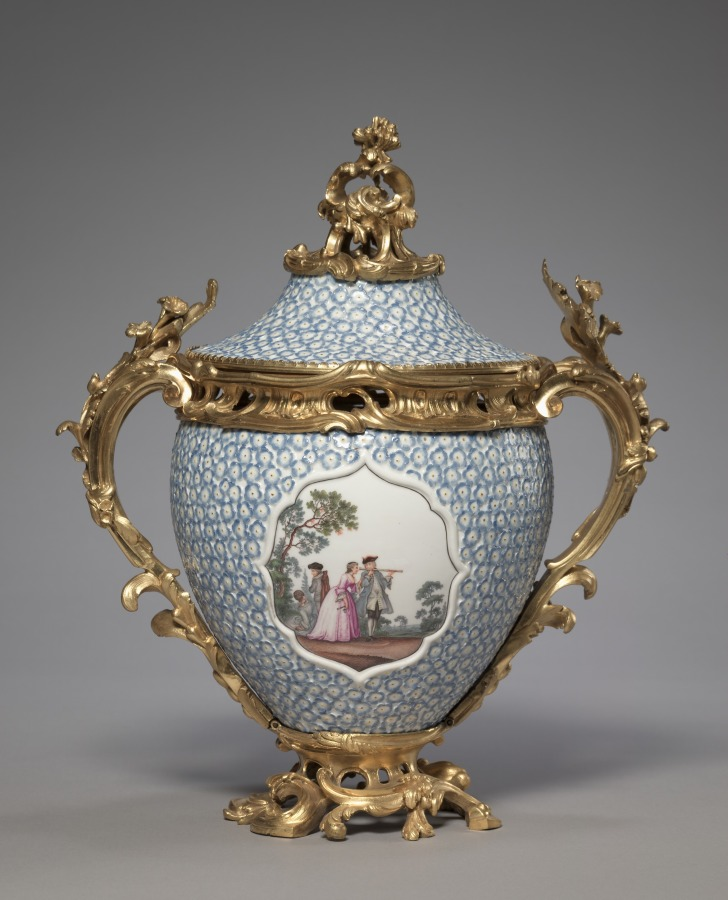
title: Covered Vase (1 of 2)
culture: Germany, 18th century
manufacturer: Meissen Porcelain Factory (German, est. c. 1710)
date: 1749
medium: porcelain mounted in gilt bronze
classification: Ceramic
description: One of these vases is dated 1749. They were perhaps part of a set of four covered vases that we know from documents were acquired by Mme. de Pompadour, mistress of Louis XV in 1752.